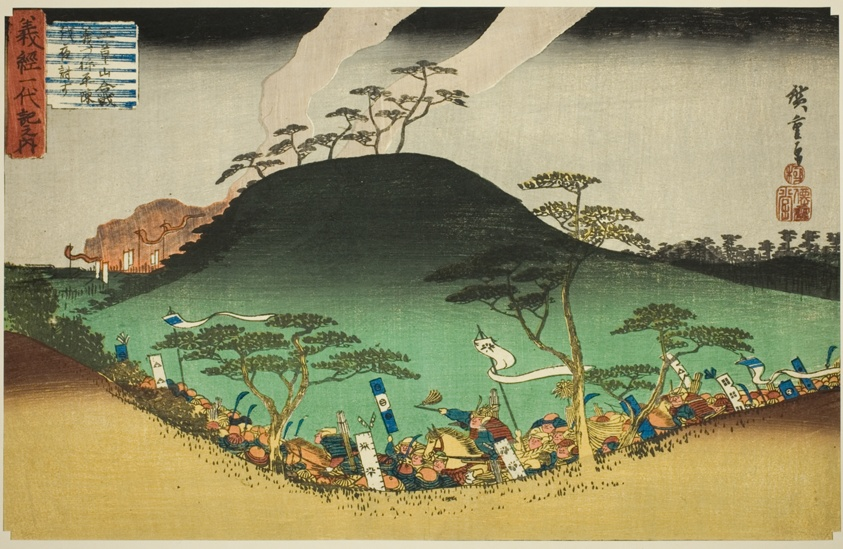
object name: Print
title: No. 3: Yoshitsune's Night Attack Against the Taira Army at the Battle of Mount Mikusa (Sankai, Mikusa gassen Yoshitsune Heijin batsu yoru utsu), from the series "The Life of Yoshitsune (Yoshitsune ichidaiki no uchi)"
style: Japanese (culture or style)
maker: Utagawa Hiroshige 歌川 広重; Japanese, 1797-1858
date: c. 1832/34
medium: Color woodblock print; oban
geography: Japan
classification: woodblock print; print; asian art